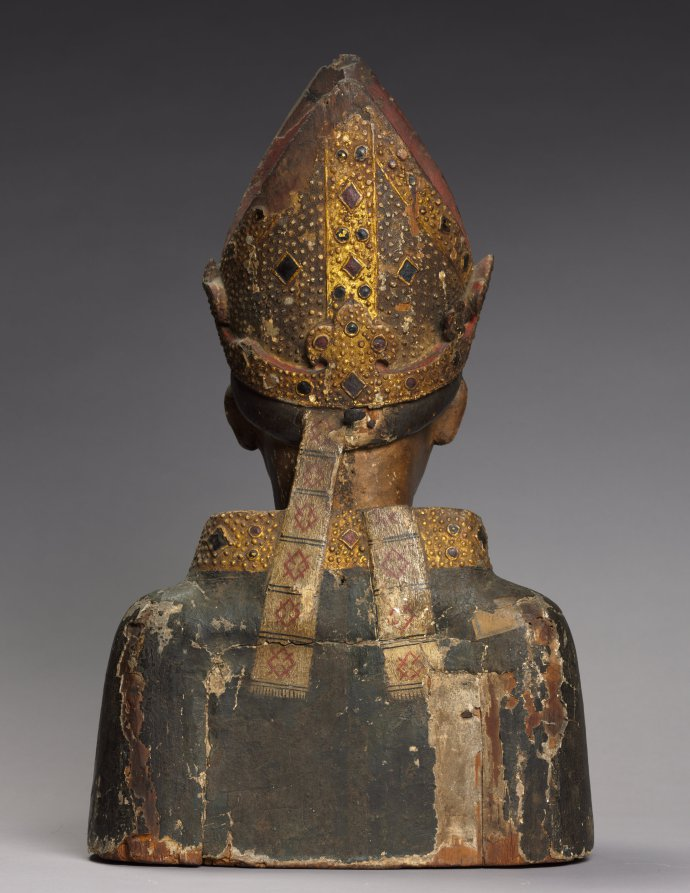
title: Bust Reliquary of St. Louis, Bishop of Toulouse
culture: Italy, Tuscany, Siena(?)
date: late 1300s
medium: wood (walnut) with polychromy, gesso and gilding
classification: Sculpture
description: This reliquary bust was probably made to house a relic of Saint Louis, Bishop of Toulouse (1274–97), second son of Charles II of Anjou, King of Naples (1288–1309). Renowned for his works of charity, he was made bishop in 1297 and died shortly after at the age of 23. He was canonized in 1317, and his cult of veneration spread rapidly in Italy and Spain. In art, Louis is generally represented as a "boy" bishop without a beard and with youthful features. The relic (now lost) would have been enshrined within. On feast days the reliquary would have likely been carried in procession and otherwise placed in a church sanctuary or on a side altar for the veneration of the faithful. Relics were the physical remains of the saints, chiefly their bodies. The living venerated the relics of the saints in order to seek their patronage, which in turn provided a proximate link to the divine ruler. The power of the saints was therefore manifested by and through their relics, or objects that were owned or touched by them. Medieval pilgrims, in a world fraught with peril, sought close physical contact with relics, which protected both the spiritual and temporal welfare of laypeople and religious communities.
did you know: This small bust was hewn out of wood, but painted realistically. Its life-like accuracy gave the medieval worshipper the sense that they were in the presence of the beloved bishop Saint Toulouse.